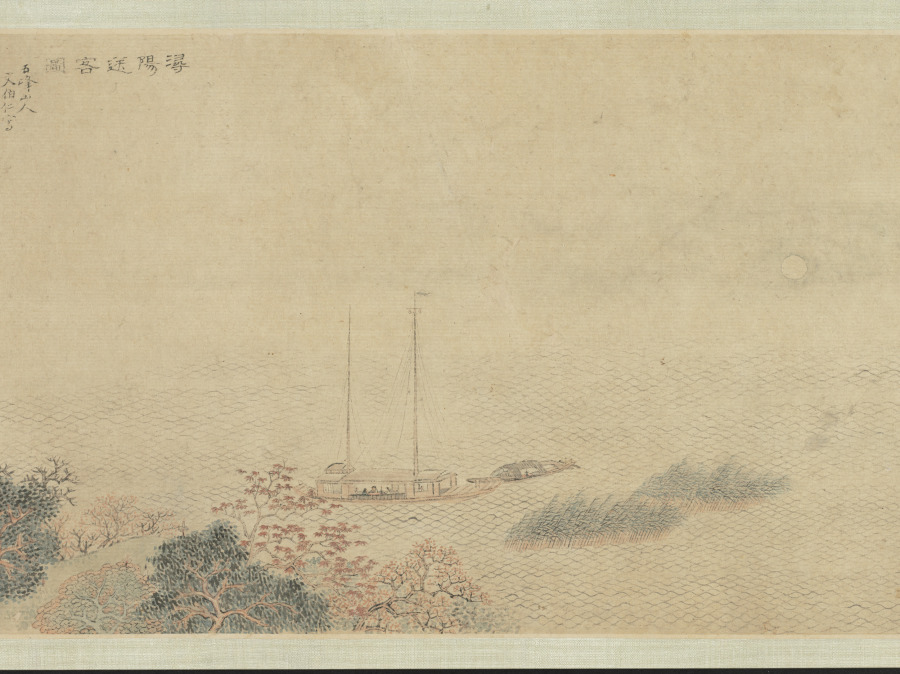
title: Saying Farewell at Xunyang (Song of the Pipa)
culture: China, Ming dynasty (1368–1644)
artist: Wen Boren (Chinese, 1502–1575)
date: 1500s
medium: handscroll, ink and color on paper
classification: Painting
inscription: "潯陽送客圖" 五峰山人文伯仁寫于停雲館中 [印] 文伯仁; 五峰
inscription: 2 colophons and 9 additional seals: 1 transcription of "Pipa xing 琵琶行” (Song of Pipa) and 3 seals of Zhu Yizun 朱彜尊 (1629-1709); 2 seals of Wu Rongguang 吳榮光 (1773-1843); 1 colophon, dated 1826, and 3 seals of Wu Xijia 吳錫嘉 (mid-1700s)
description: This handscroll depicts The Song of the Pipa, a poem by Bai Juyi 白居易 (772–846) written after the poet’s encounter with a pipa player on the Yangzi River. Expelled from her home city when her beauty and fame had faded, she played for the poet at night. Her musical performance and tragic life story resonated with Bai Juyi, who had just been demoted and exiled from life at court himself. The hazy, vast view and pale color tonalities of this painting illustrate these feelings of endless sadness, having lost one’s sense of purpose in life.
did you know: Wen Boren depicted the chilly autumn water with a fishnet pattern.